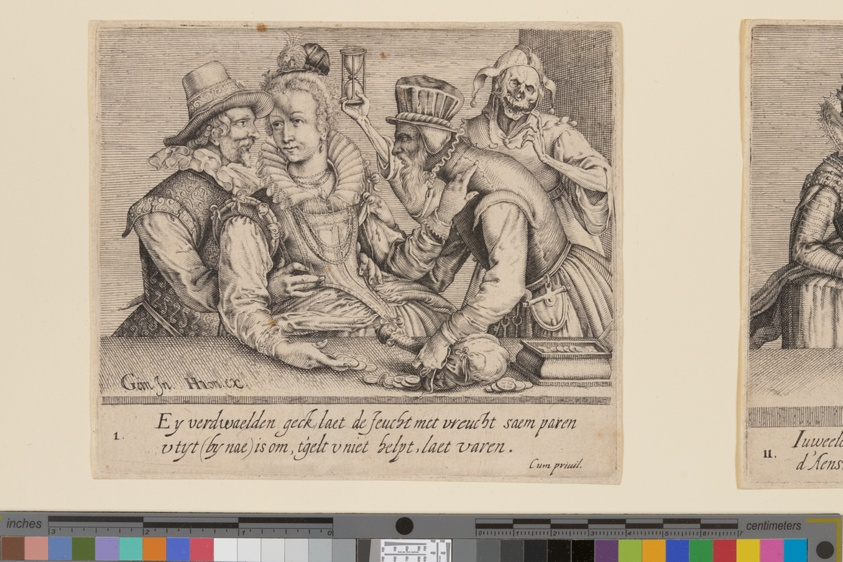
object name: Print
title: A Young Woman between a Young Man and an Old Man, from Unequal Lovers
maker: Attributed to Andries Stock (Netherlandish, 1572/82-after 1648); after Jacques de Gheyn II (Dutch, 1565–1629)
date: c. 1610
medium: Engraving on ivory laid paper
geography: Netherlands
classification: engraving; paper; print; prints and drawing